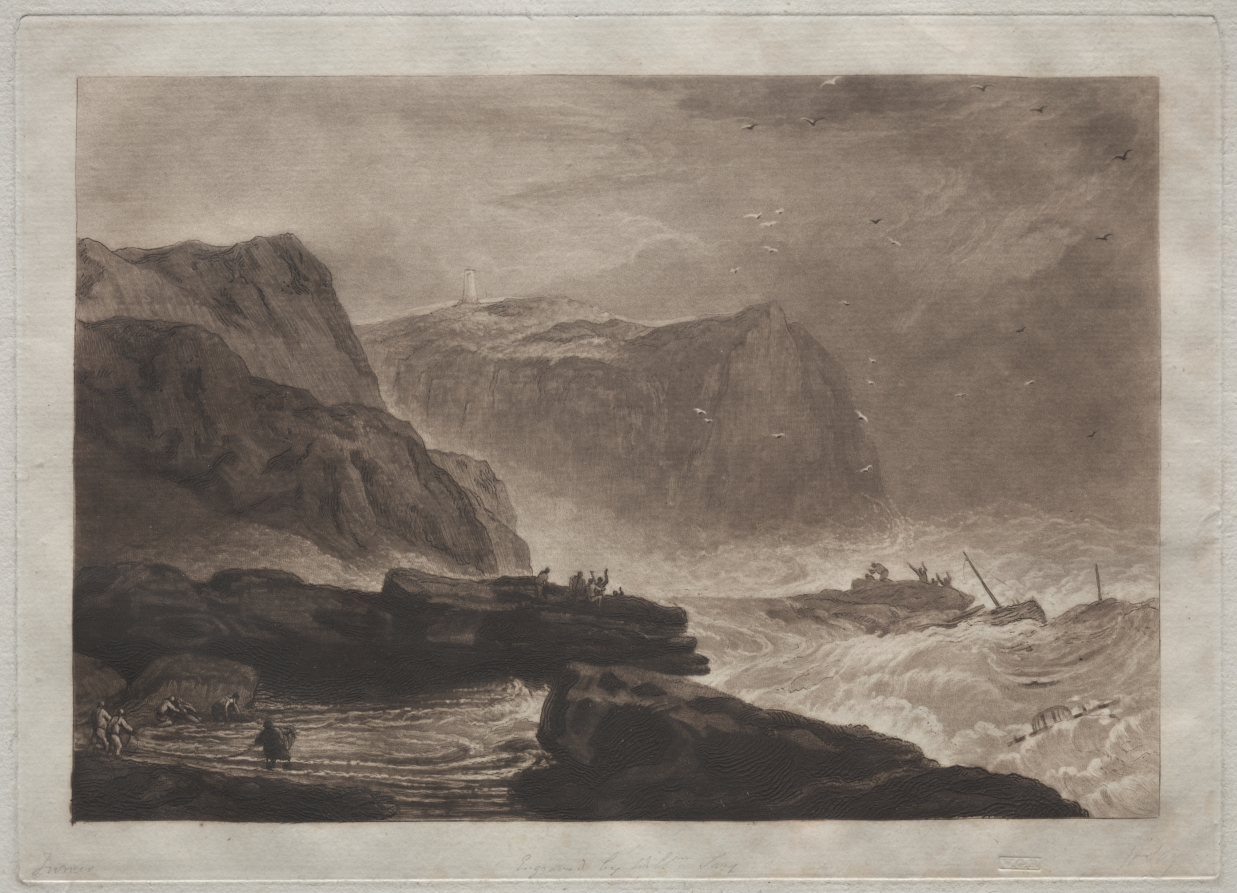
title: Liber Studiorum: Coast of Yorkshire, near Whitby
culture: England, 19th century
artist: Joseph Mallord William Turner (British, 1775–1851)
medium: etching and mezzotint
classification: Print